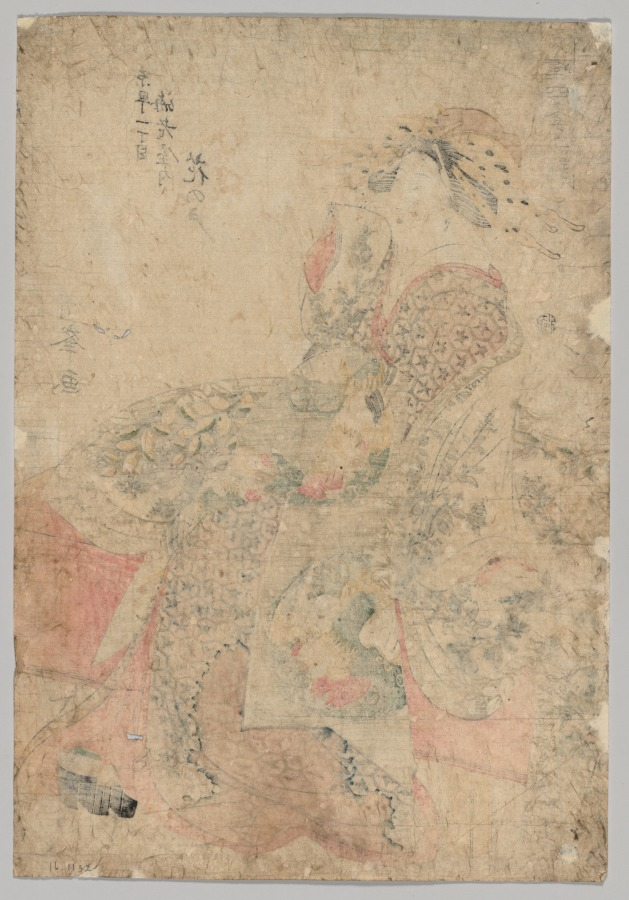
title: Hananoto of the Ebiya in Kyōmachi 1-chome, from the series Songs of the Four Seasons in the Pleasure Quarters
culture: Japan, Edo period (1615–1868)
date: 1690–1730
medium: color woodblock print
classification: Print